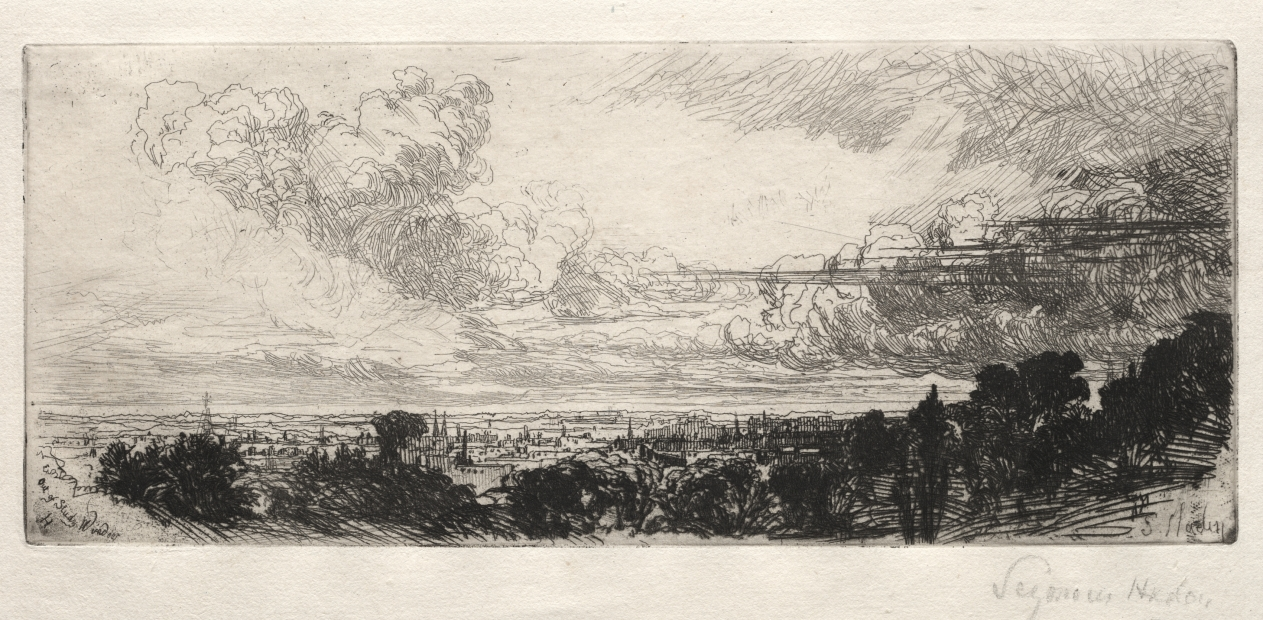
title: Out of Study Window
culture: England, 19th century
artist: Francis Seymour Haden (British, 1818–1910)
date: 1862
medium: etching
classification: Print